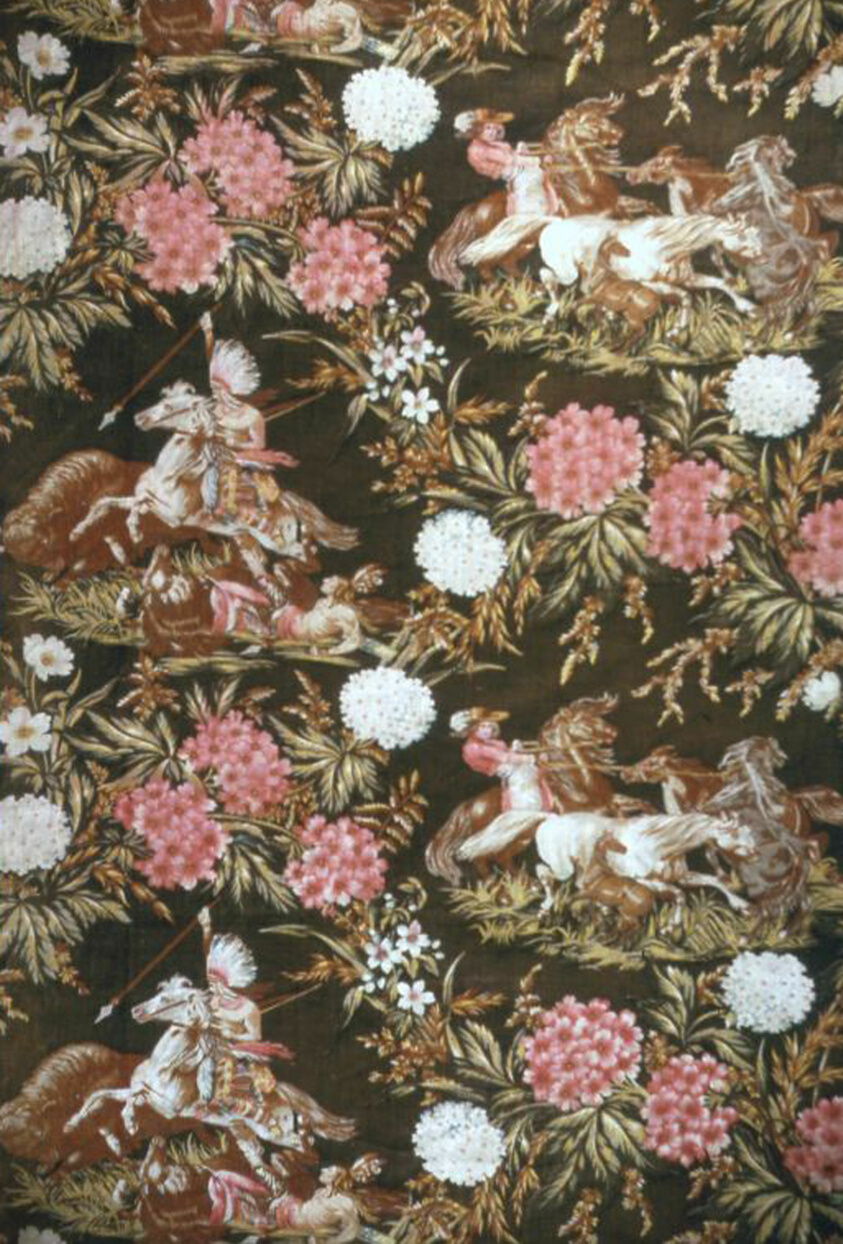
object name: Textile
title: Panel (Furnishing Fabric)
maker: United States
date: c. 1853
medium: Cotton, plain weave; printed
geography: United States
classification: textile; weaving - printed; furnishing textile